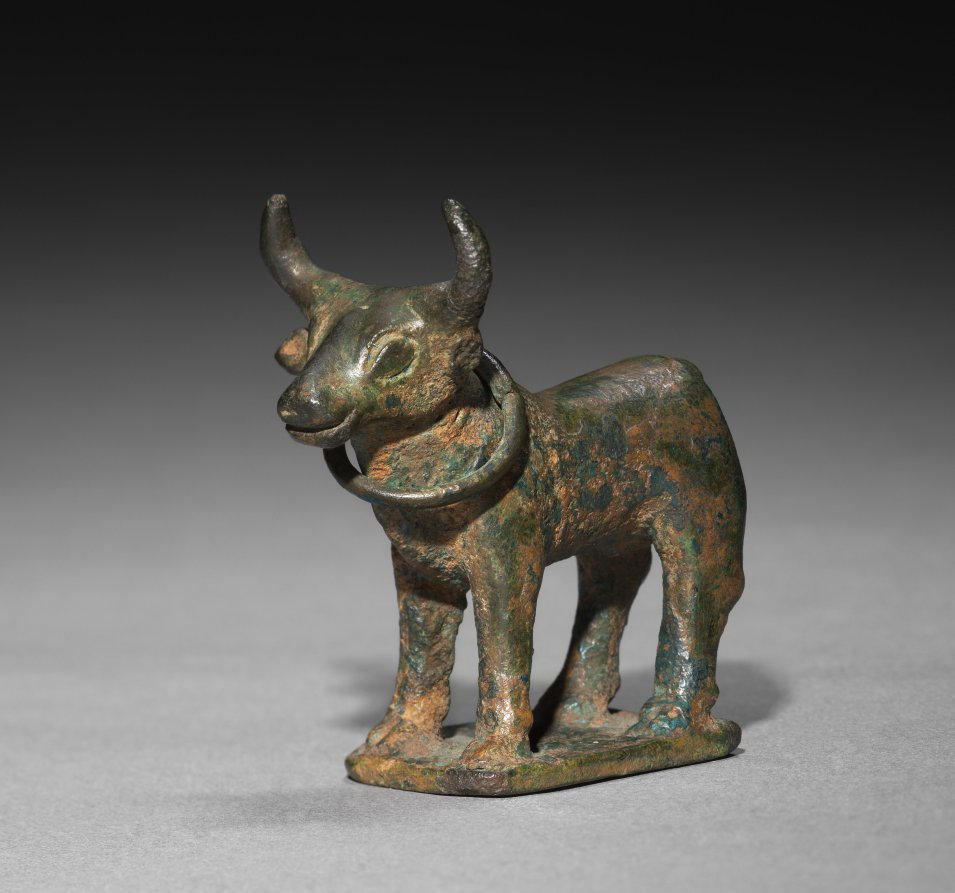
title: Statuette of a Bull with Curved Horns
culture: Egypt(?)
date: late 2000s BCE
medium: bronze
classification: Sculpture